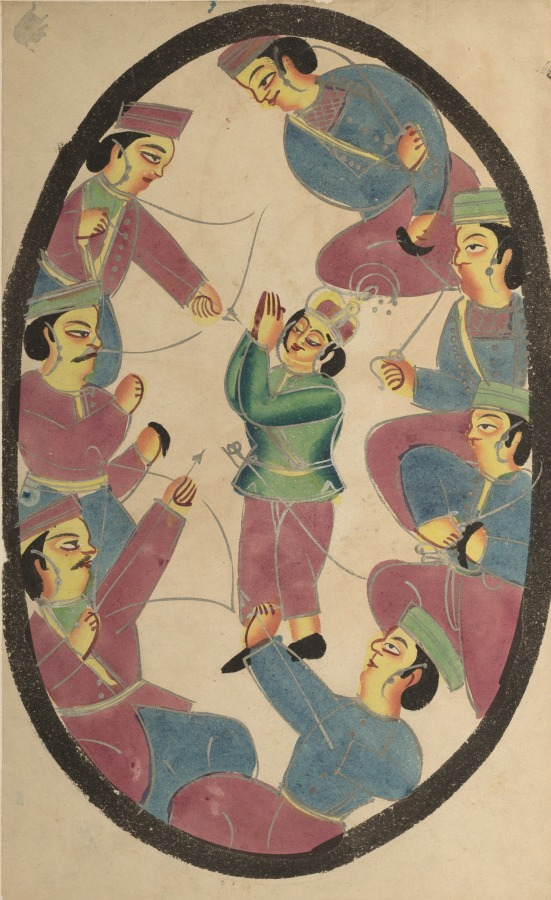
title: Seven Heroes or Warriors Killing Abhimanya, Son of Arjuna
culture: Eastern India, Bengal, Kolkata, Kalighat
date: c. 1890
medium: Gum tempera, graphite, ink, and tin on paper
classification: Painting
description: Abhimanyu (son of Arjuna and Subhadra, nephew of Krishna) is a tragic figure from the epic Mahabharata (The Great History of the Descendants of Bharat). As a fetus in his mother’s womb he hears how to penetrate the Chakravyuha, a circular pattern of troops, from his father Arjuna who is talking with his mother Subhadra. Noticing that Subhadra is asleep, Arjuna stops speaking and does not explain to her how to escape after attacking it. Abhimanyu thus only has partial knowledge. Here he is depicted as surrounded in the Chakravyuha and about to be killed.